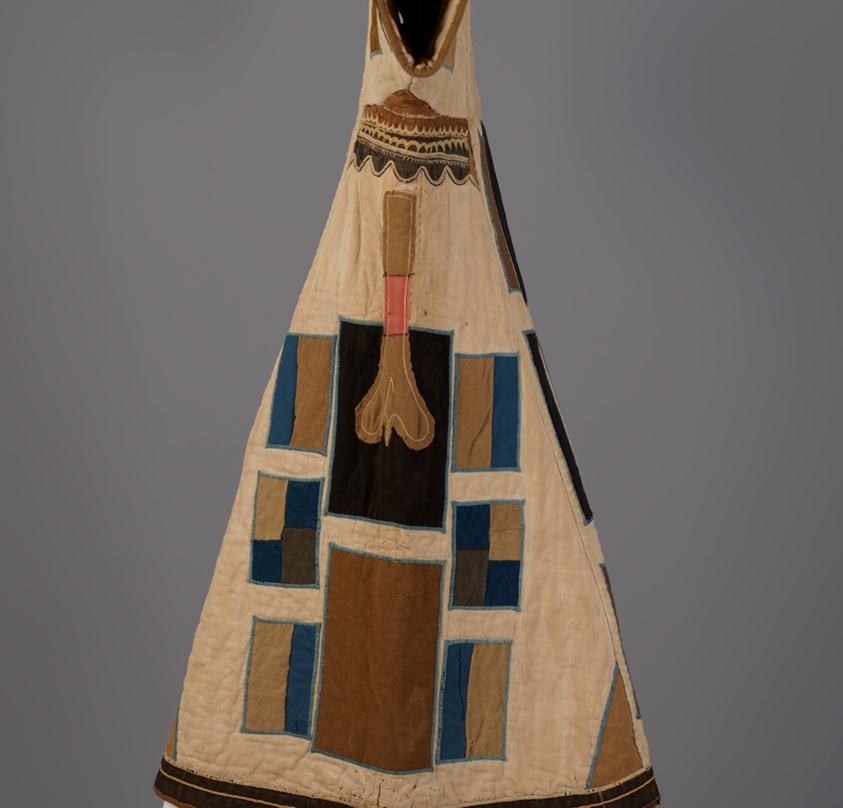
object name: Costume and Accessories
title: Tunic (Jibbeh)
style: Arts of Africa, 19th century, east african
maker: Mahdiyya State, Sudan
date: 1885/99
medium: Layers of cotton, plain weave; pieced and quilted; appliquéd with wool and wool and cotton plain weaves and wool twill weaves; embroidered with cotton in chain, cross, and a derivative of herringbone stitches; applied plied yarn edging; lined with cotton plain weaves; pieced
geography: Sudan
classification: tunic; arts of Africa; costume; garment; textile; dress (garment)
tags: garment, rectangles, black (color), tan (color), brown (color), lines, colonialism, Freedom, military, military uniforms, soldiers, uniforms